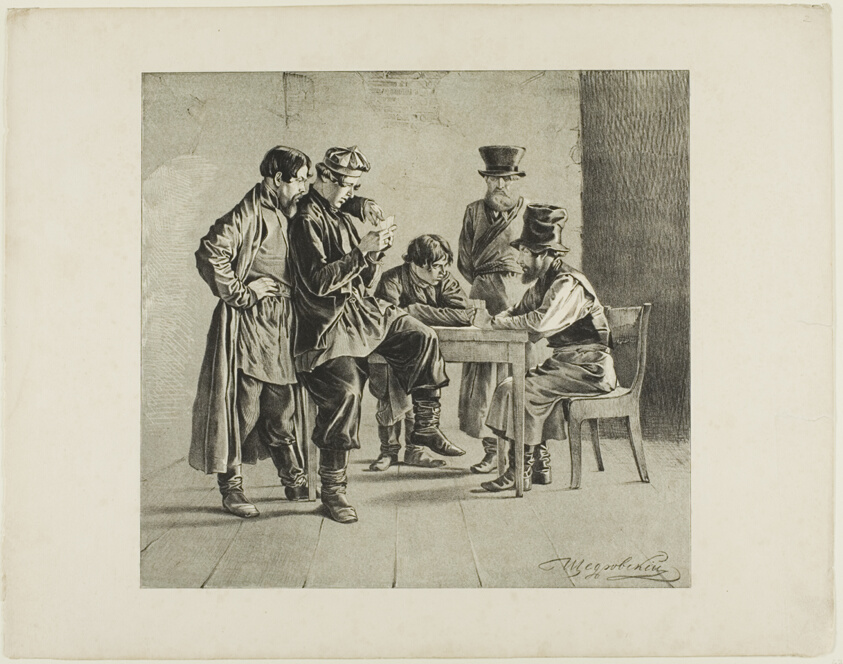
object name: Print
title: Scenes from Russian Folk Life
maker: Ignatii Stepanovich Shchedrovskii (Russian, 1815-1870)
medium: Color lithograph on paper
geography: Russia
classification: lithograph; print; prints and drawing